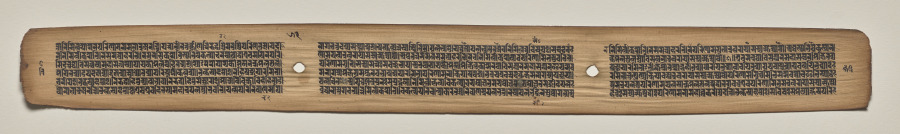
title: Text, folio 53 (verso), from a Manuscript of the Perfection of Wisdom in Eight Thousand Lines (Ashtasahasrika Prajnaparamita-sutra)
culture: Eastern India, Bihar, Vikramashila Monastery. Painting: Nepal, Kathmandu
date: Sunday, September 14, 1119 (year 239 of the Newar Samvat in the month of Ashvina)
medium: gum tempera and ink on palm leaves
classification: Painting